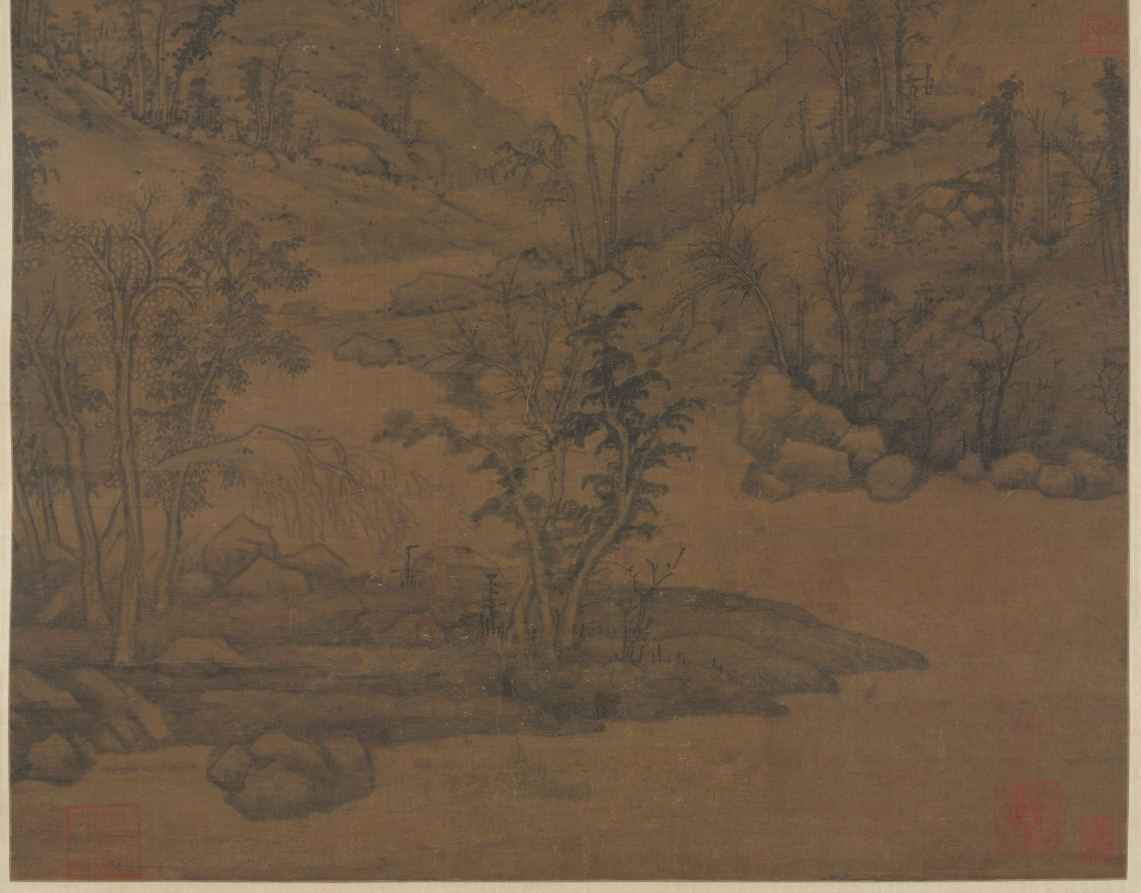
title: Summer Mountains (after Dong Yuan [active c. 937–75])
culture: China, Yuan dynasty (1271-1368)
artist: attributed to Huang Gongwang (Chinese, 1269–1354)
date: 1290–1354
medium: hanging scroll; ink and slight color on silk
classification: Painting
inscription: 【印】一峰道人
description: This monumental landscape is drawn in softly rounded strokes with darker lines frequently applied on top of lighter ones. This technique recalls one of the suggestions included in a collection of the artist's writings known as Secrets of Landscape Painting: The most difficult thing in painting is using the ink. The artist begins by using dilute ink and builds it up to the point where it begins to look right, then uses dense, black ink, applied fairly dry, and washes of deeper-toned ink. This technique distinguishes the fields from the paths, the far from the near. Huang Gongwang may have learned this technique from observing nature through the eyes of an earlier master, Dong Yuan, a painter whose style he shared.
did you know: The wet hills and moist, rich atmosphere evoke the southern Chinese summer, characterized by monsoon rains and lush growth.